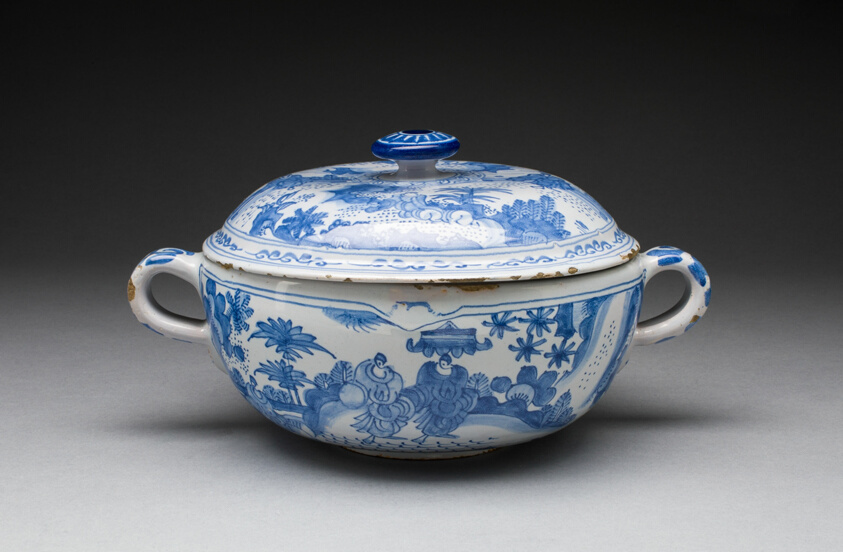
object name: Ceramics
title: Covered Bowl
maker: Netherlands, Delft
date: c. 1700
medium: Tin-glazed earthenware (Delft)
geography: Delft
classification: bowl; earthenware; dish (vessel); european decorative arts; ceramics